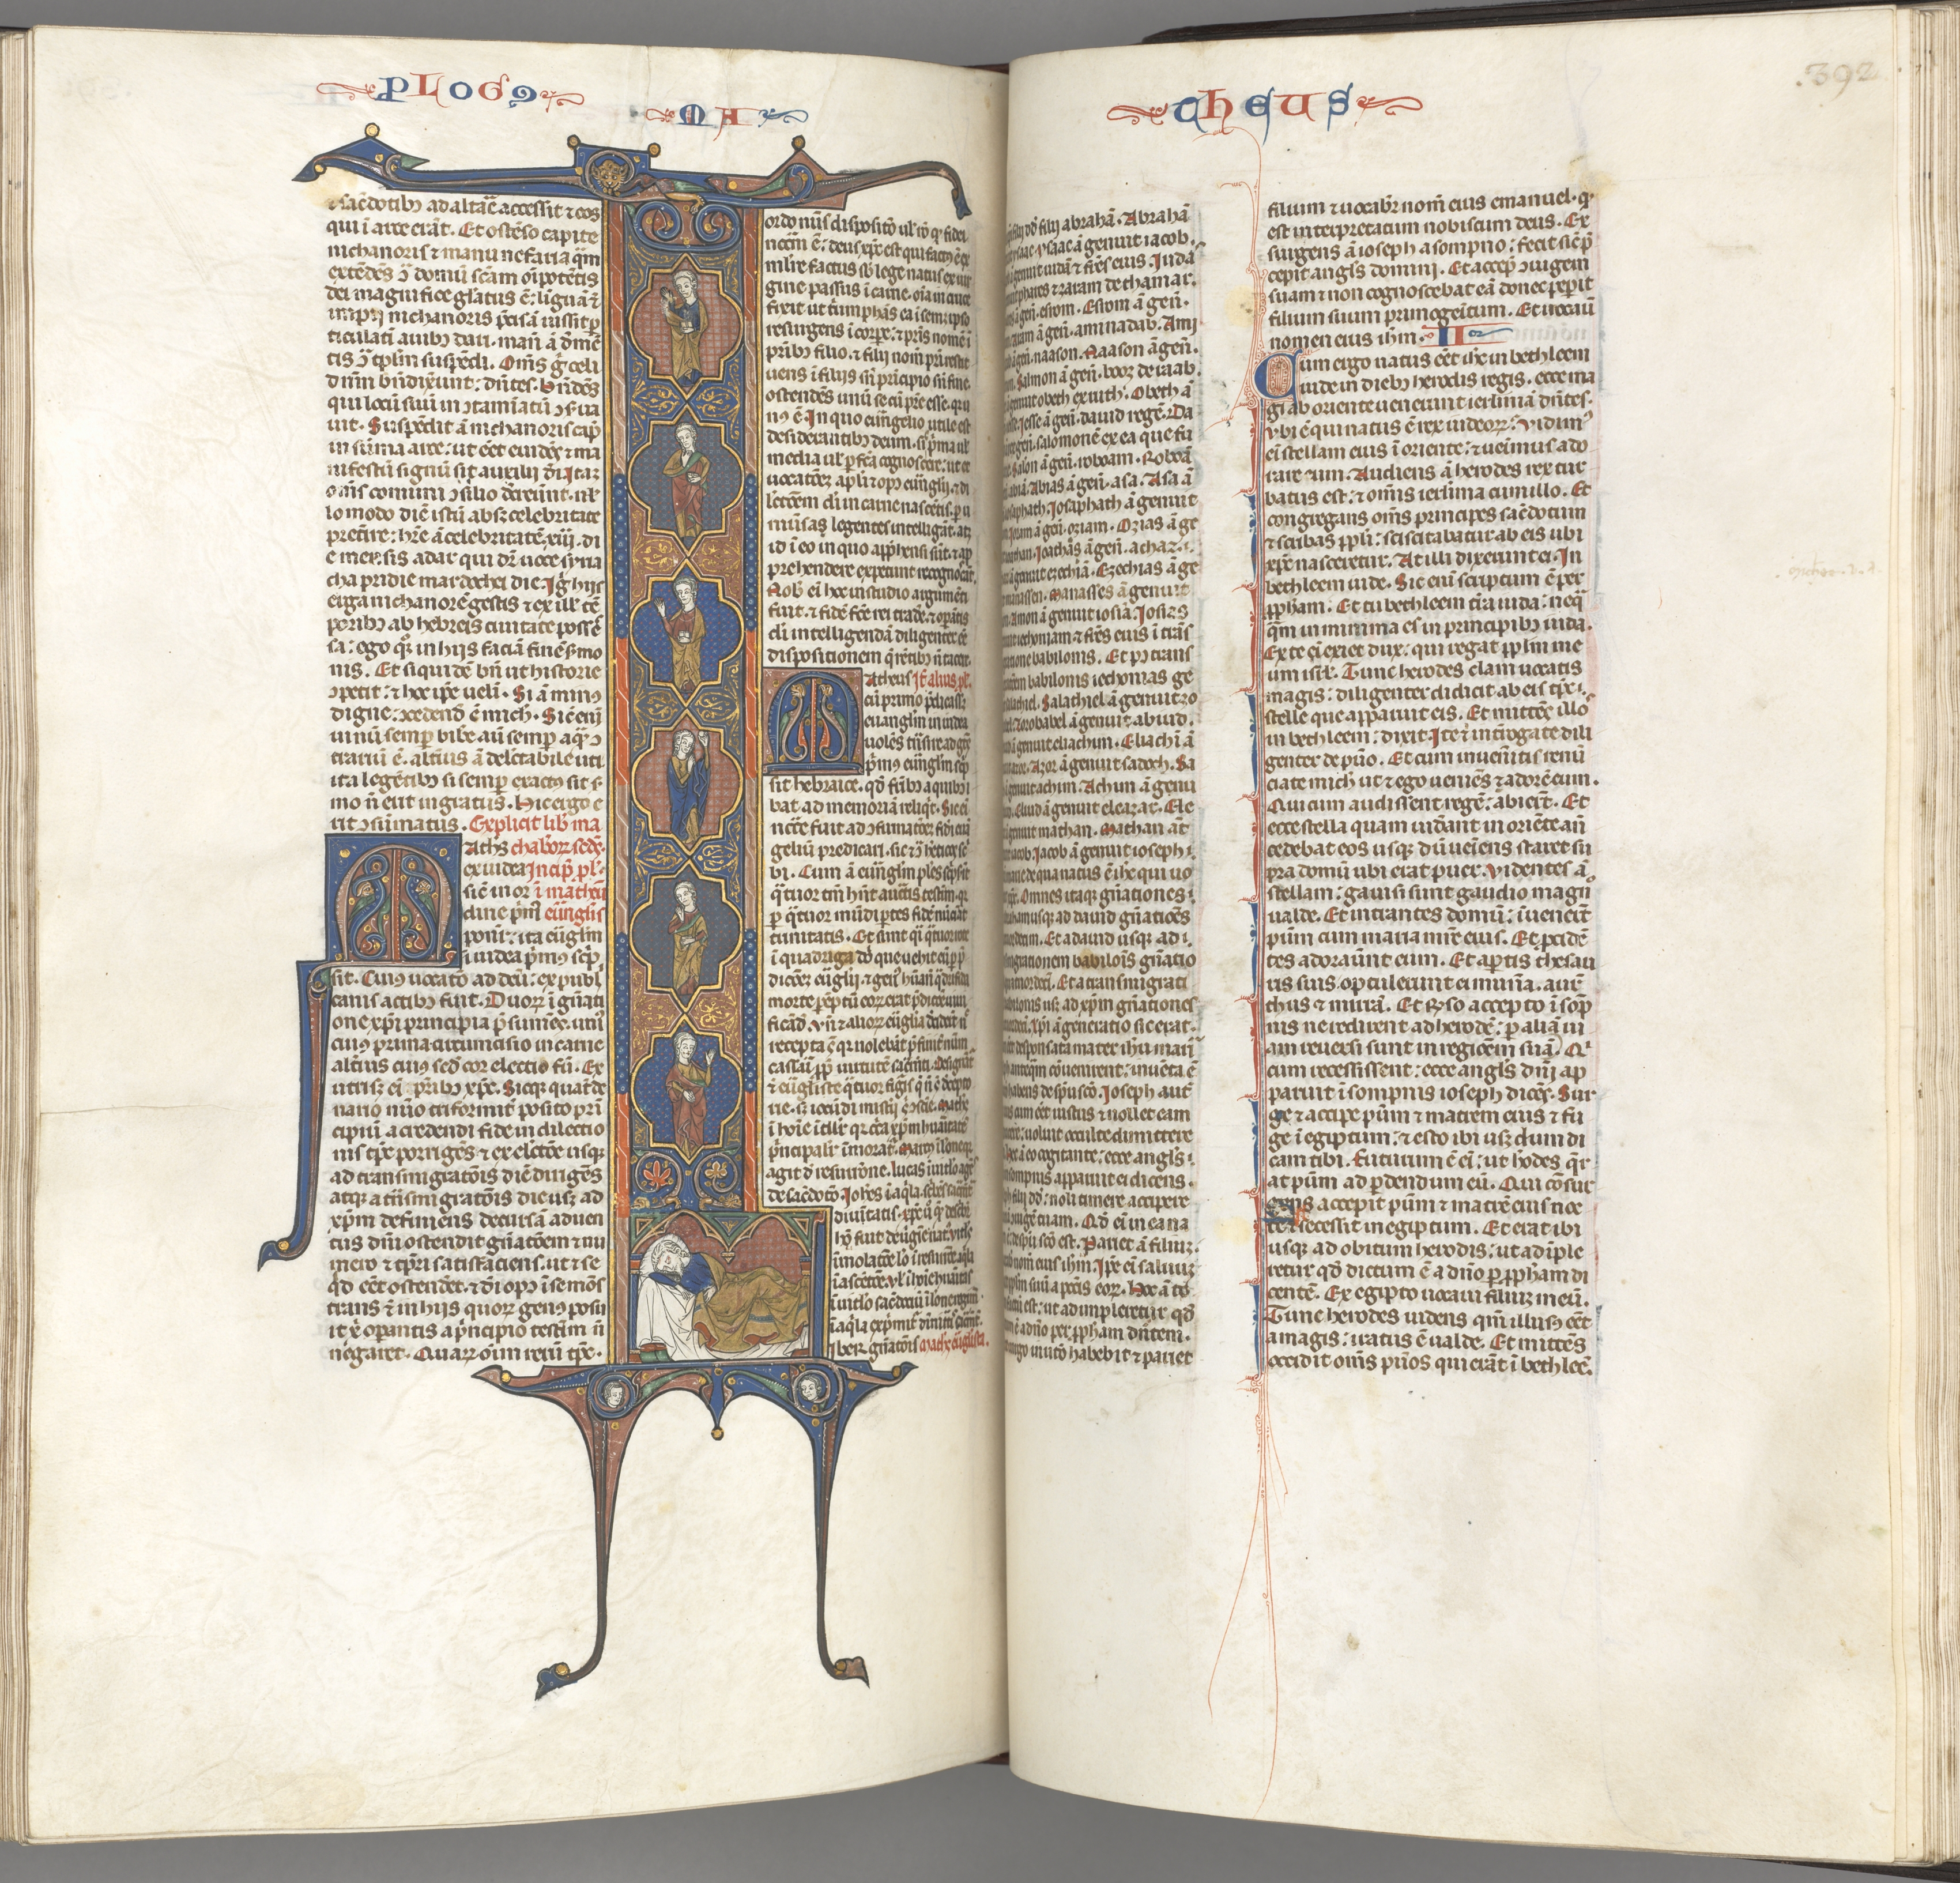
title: Fol. 391v, Matthew, full-length historiated initial L, the Tree of Jesse, with a sleeping Jesse at the base and six of the ancestors of Christ in irregular compartments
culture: Southern France, Toulouse(?), 13th century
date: c. 1275–1300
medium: ink, tempera and gold on vellum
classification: Bound Volume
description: Biblical manuscripts were highly prized and important possessions of churches, monasteries, cathedral schools, and universities throughout medieval Europe. The biblical texts were known as the vulgate, the translations made by Saint Jerome in the fourth century from Hebrew and Greek into Latin, which became the definitive and official Latin version of the Roman Church. In the 13th century, the bible was, for the first time, produced as a single volume with an officially sanctioned sequence to its books and chapters as illustrated by this example. The very extensive decoration of this bible is arranged hierarchically to indicate the relative importance of the various texts so that full or almost full-page initials mark the openings of the first prologue, Genesis, and the first Gospel; historiated initials mark the beginning of each book and illuminated initials mark the Prologues.